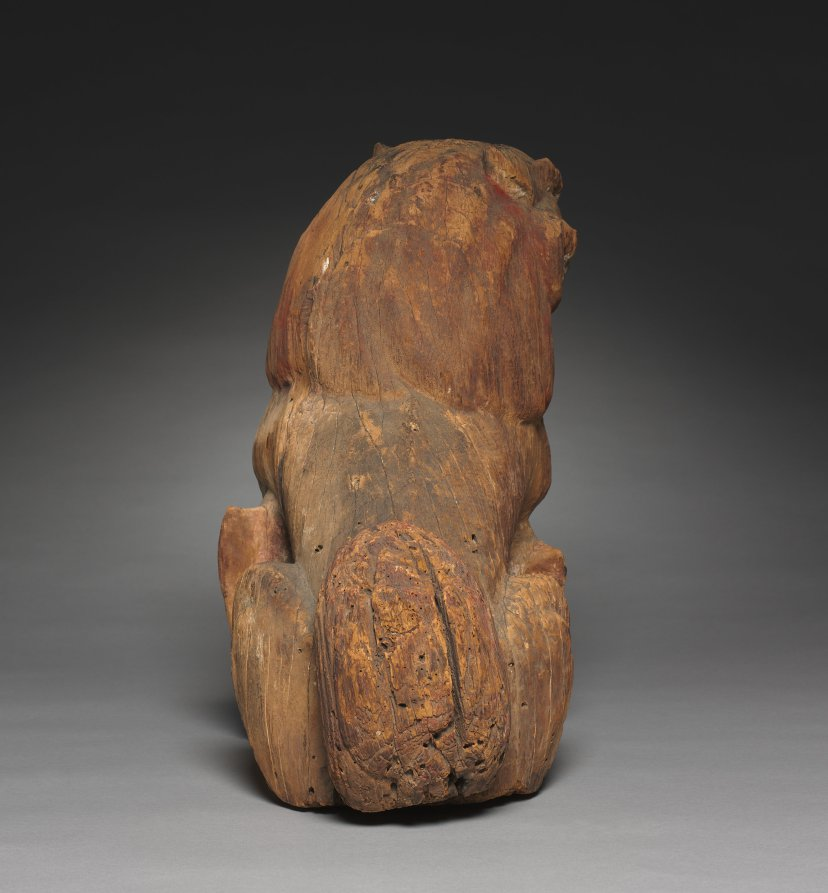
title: Guardian Animal: Komainu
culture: Japan, Kamakura period (1185–1333)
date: 1300s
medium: Wood with traces of color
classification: Sculpture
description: Placed at the entrance to shrines and temples in Japan, guardian figures ward off evil spirits. These guardians used to be painted red and white and are distinguishable by their facial expressions: the open-mouthed animal is a karashishi, or “Chinese lion,” while the close-mouthed beast, which once had a single horn protruding from its head, is called a komainu, or “Korean dog.” The mouths correspond to infinity, the syllables ah (open) and um (closed), or the alpha and omega. This pairing was widespread in ancient times in Chinese territories and likely found its way to Japan via kingdoms in Korea.